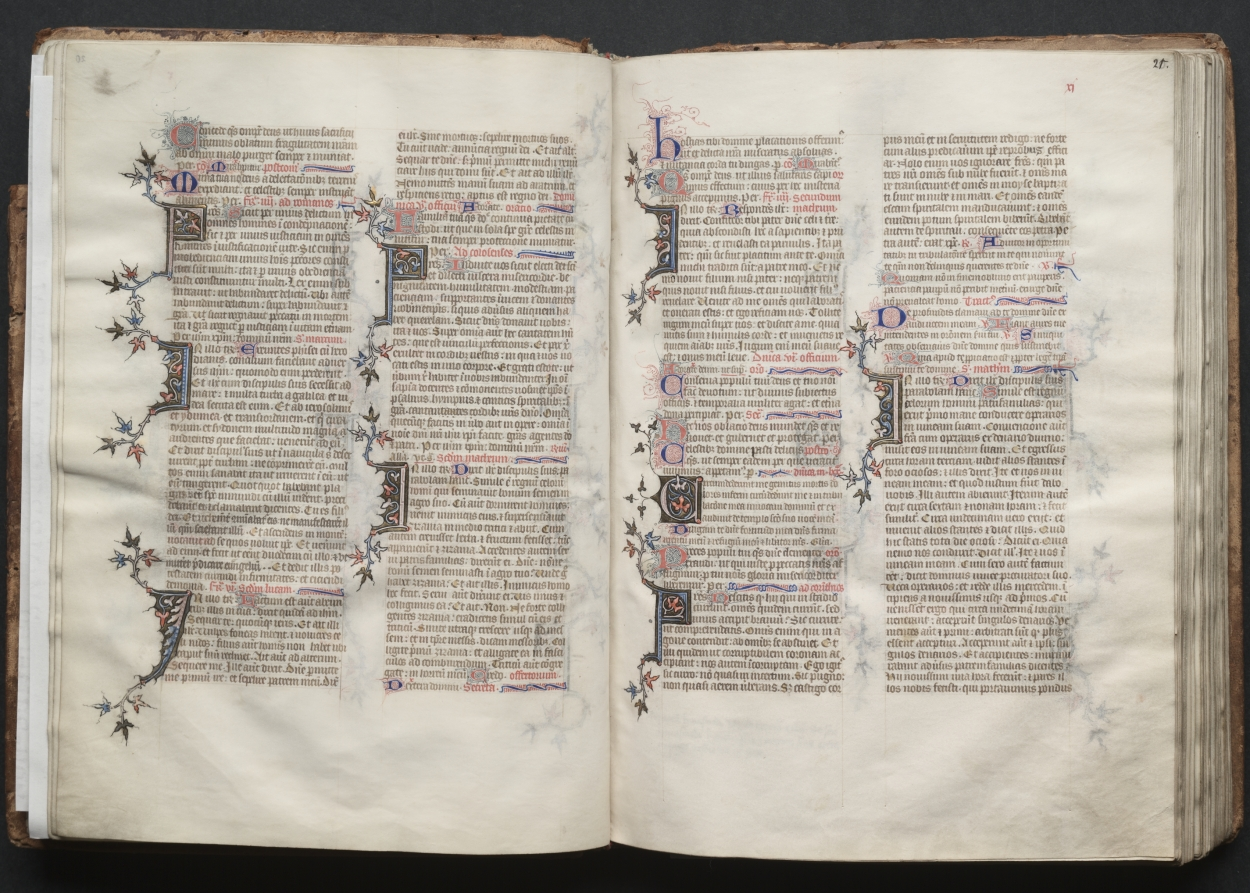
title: The Gotha Missal: Fol. 20v, Text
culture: France, Paris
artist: Master of the Boqueteaux (French)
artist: and Workshop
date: c. 1375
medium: ink, tempera, and gold on vellum; blind-tooled leather binding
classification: Bound Volume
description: The style and quality of this manuscript's decoration is typical of deluxe Parisian books made for aristocratic or royal patrons. Most of the book's decoration appears to be the work of the Master of the Boqueteaux, an artist active at the court of King Charles V (died 1380). His style was apparently shared by a number of book illuminators working in and around Paris. It is very possible that the Gotha Missal belonged to Charles V, but is not provable because the manuscript has no royal portraits and lacks a colophon. Given the book's magnificent decoration, however, it would seem that it was produced for a Valois prince, if not for the king himself. The manuscript receives its name from the German dukes of Gotha, its later owners.